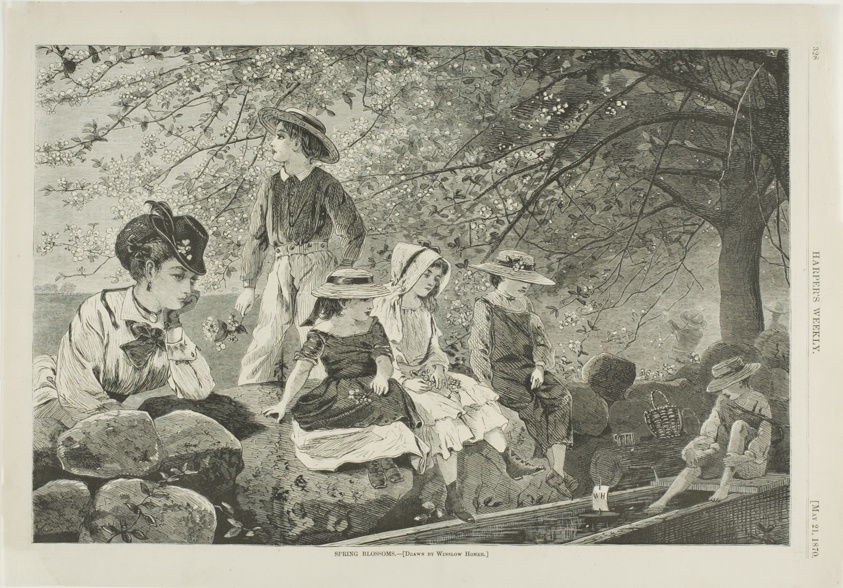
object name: Print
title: Spring Blossoms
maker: Winslow Homer (American, 1836-1910); published by Harper's Weekly (American, 1857-1916)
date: published May 21, 1870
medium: Wood engraving on buff wove paper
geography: United States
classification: wood engraving; print; prints and drawing